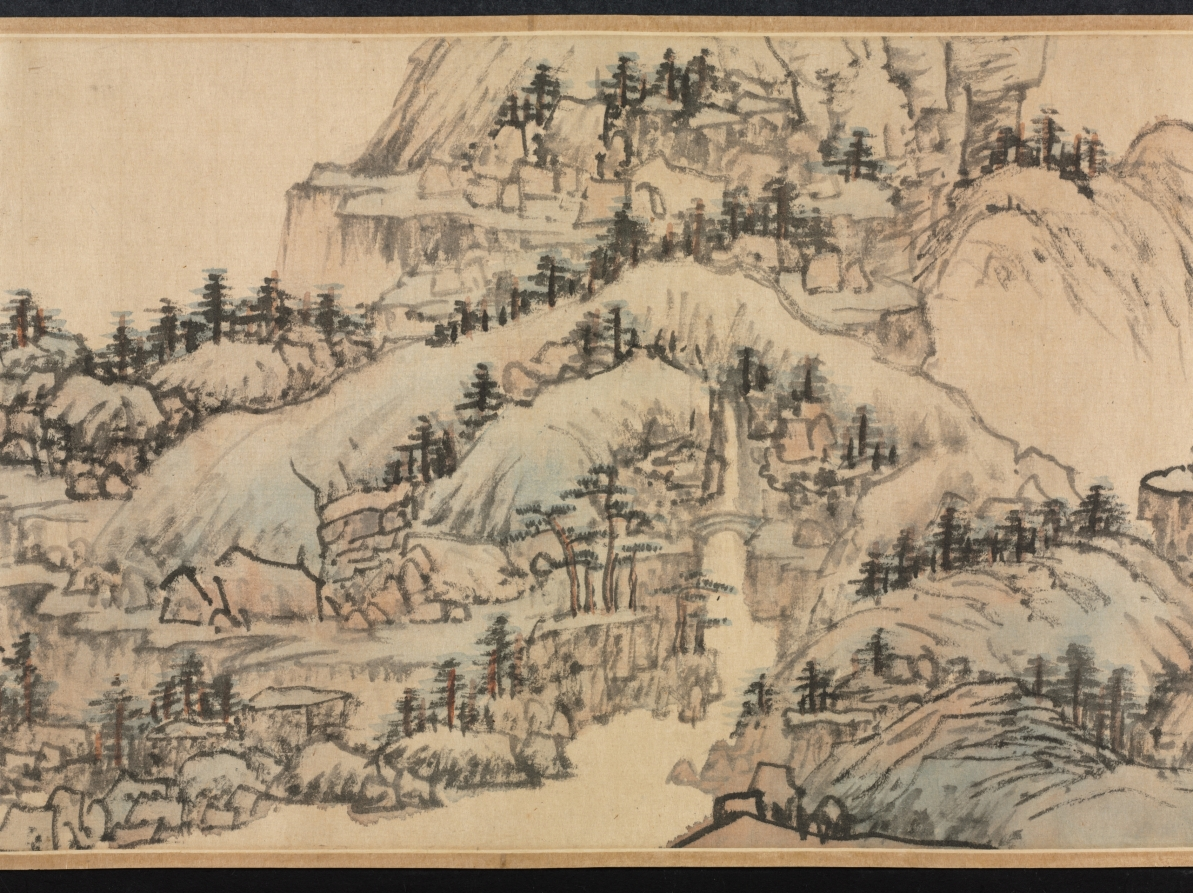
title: Dream Journey among Rivers and Mountains, no. 90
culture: China, Qing dynasty (1644-1911)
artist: Cheng Zhengkui (Chinese, 1604–1676)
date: 1658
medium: Handscroll; ink and color on paper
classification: Painting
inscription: 江山臥遊圖其九十, 青溪道人, 戊戌夏五。 [印] 程正揆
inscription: Title and inscription by Huang Yi 黃易 (1744–1802), and 3 seals.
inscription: 1 colophon and 9 additional seals: 3 seals of Dai Zhi 戴植 (active about 1821–1850); 1 colophon, dated 1914, and 3 seals of Yan Shiqing 顏世清 (1873–1929); 3 seals of Wang Nanping 王南屏 (1924–1985).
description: Cliffs and waterfalls interspersed with trees and dotted vegetation are spread over this handscroll. Long paths wind their way through villages, beside cottages, shrines, and over bridges. In the past, Chinese literati officials liked to take a “dream journey” along mountains and rivers when viewing landscape paintings in their studios. Scenery of this kind thus became a way to escape from the world of bureaucracy and administration. The painter Cheng Zhengkui used the title “Dream Journey” for a whole series of paintings, of which this is number 90. He is said to have painted 500 of them, but the actual count remains unknown.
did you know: Cheng Zhengkui planned to make 100 dream journey paintings but may have ultimately made 500.